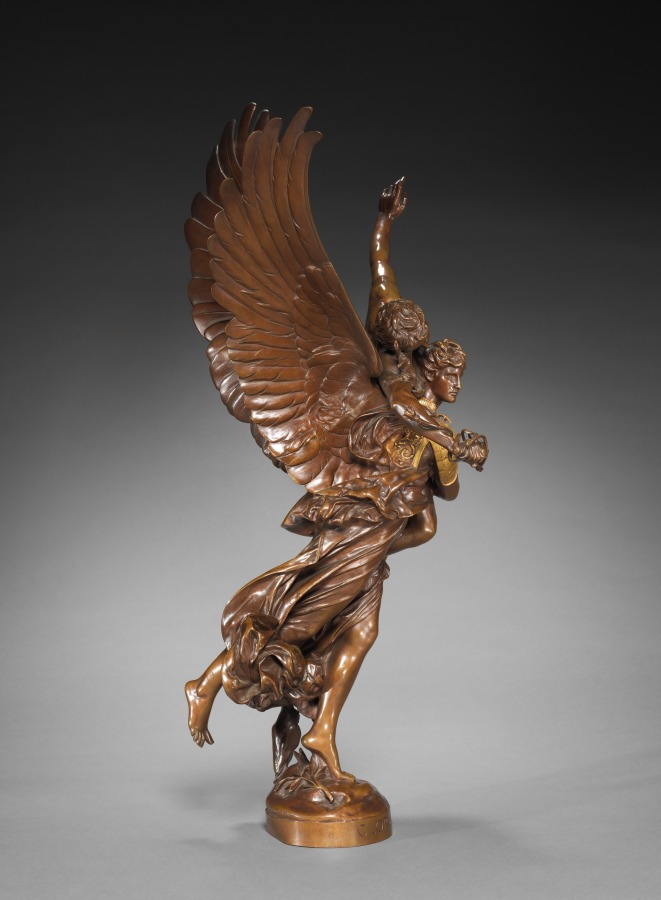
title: Gloria Victis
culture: France, 19th century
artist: Antonin Mercié (French, 1845–1916)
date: c. 1880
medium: bronze with gilding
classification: Sculpture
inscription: Signed near foot at right: "A. MERCIE."; inscribed rear: "F. BARBEDIENNE. FONDEUR."; inscribed front of base: "GLORIA VICTIS."